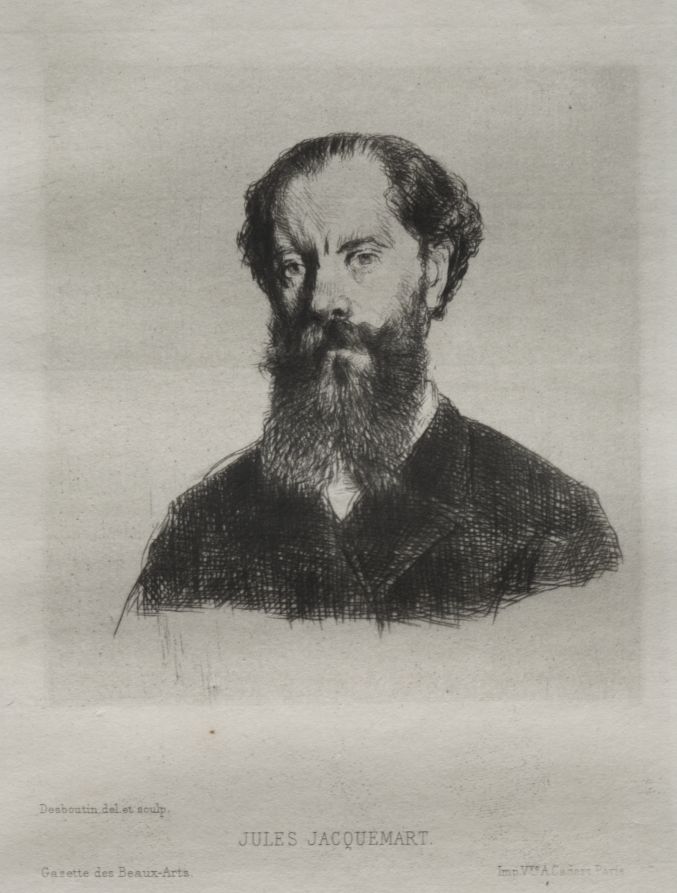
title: Jules Jacquemart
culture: France, late 19th-early 20th century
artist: Marcellin Gilbert Desboutin (French, 1823–1902)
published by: Gazette des Beaux-Arts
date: 1876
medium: etching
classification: Print